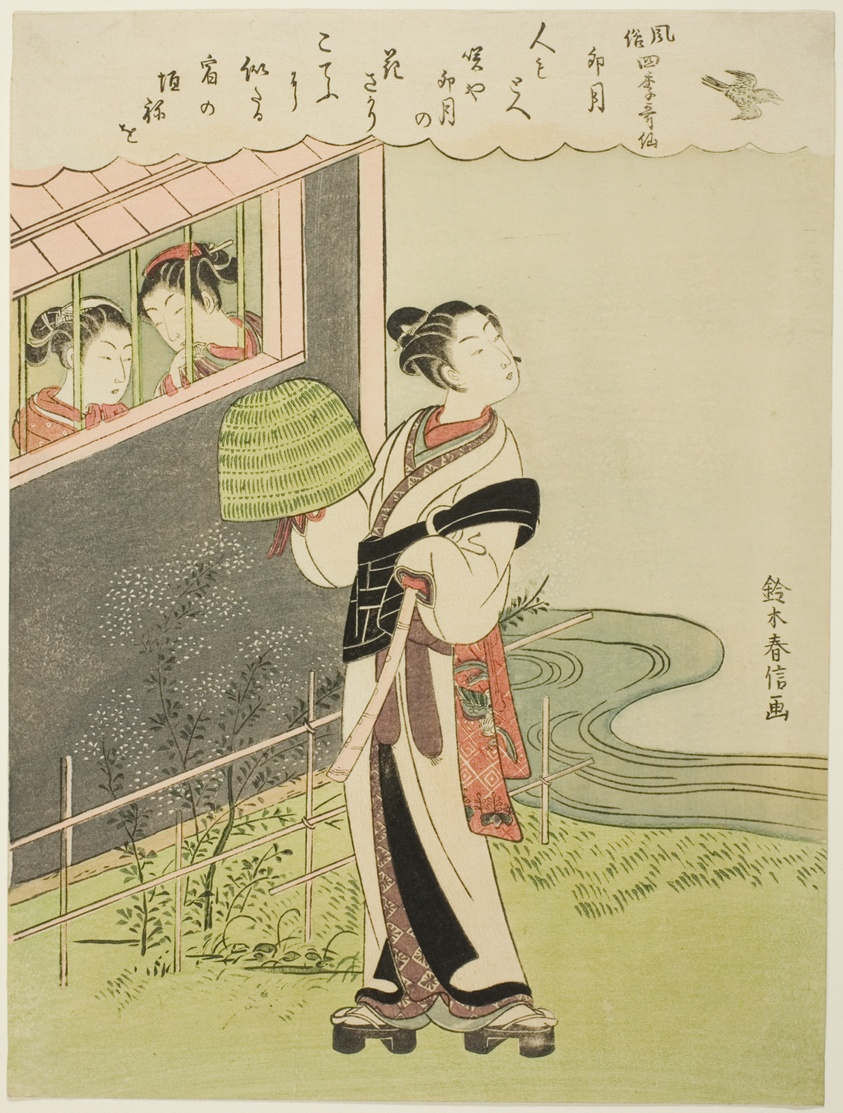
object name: Print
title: The Fourth Month (Uzuki), from the series "Popular Versions of Immortal Poets in Four Seasons (Fuzoku shiki kasen)"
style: Japanese (culture or style)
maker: Suzuki Harunobu 鈴木 春信; Japanese, 1725 (?)-1770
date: c. 1768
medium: Color woodblock print; chuban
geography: Japan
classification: woodblock print; print; asian art